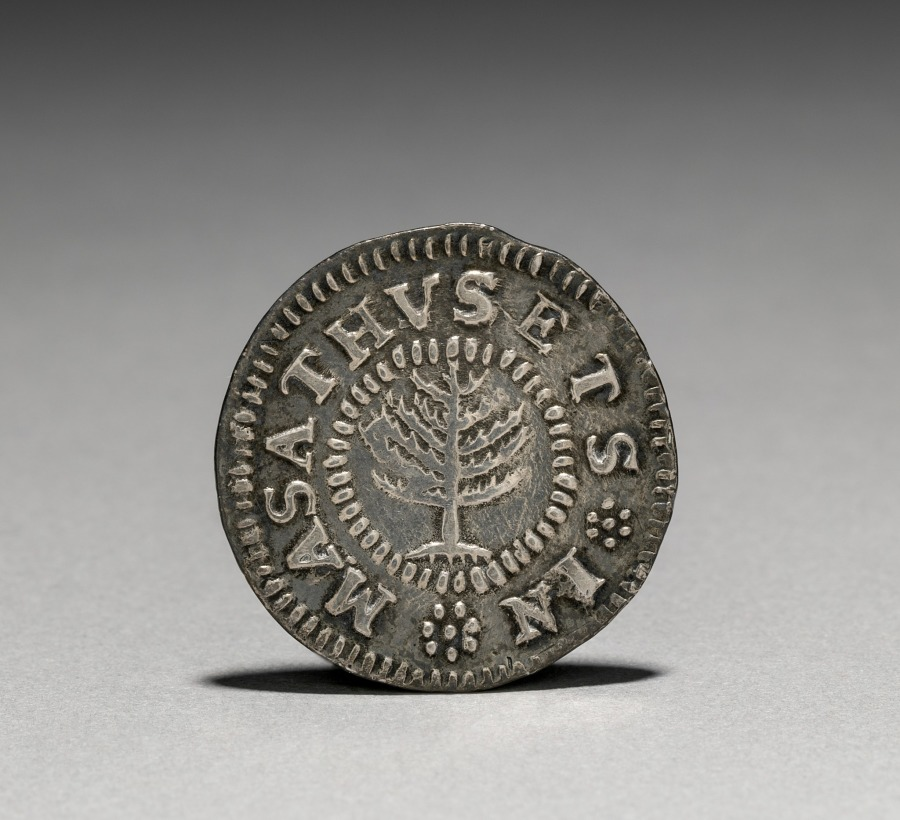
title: Pine Tree Shilling (obverse)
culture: America, Massachusetts, Boston, 17th century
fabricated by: John Hull (American, 1624–1683)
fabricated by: Robert Sanderson (American, 1609–1693)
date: 1652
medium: silver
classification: Coins